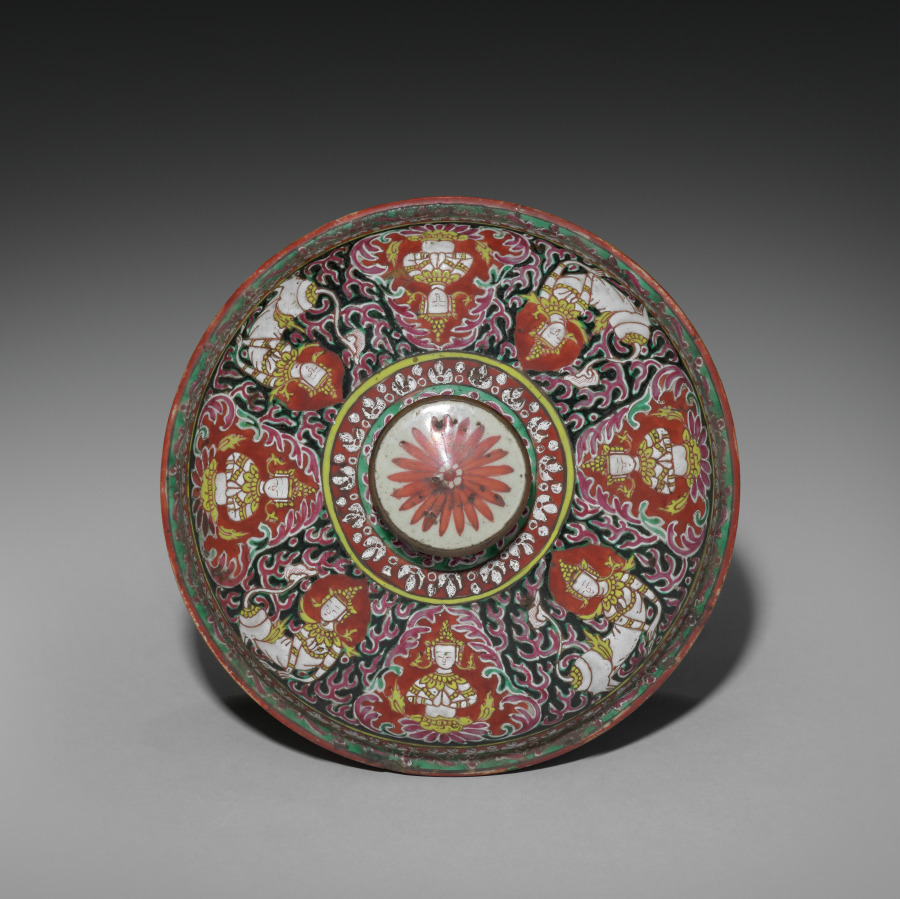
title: Jar (lid)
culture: Siam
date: 1800s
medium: porcelain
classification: Ceramic